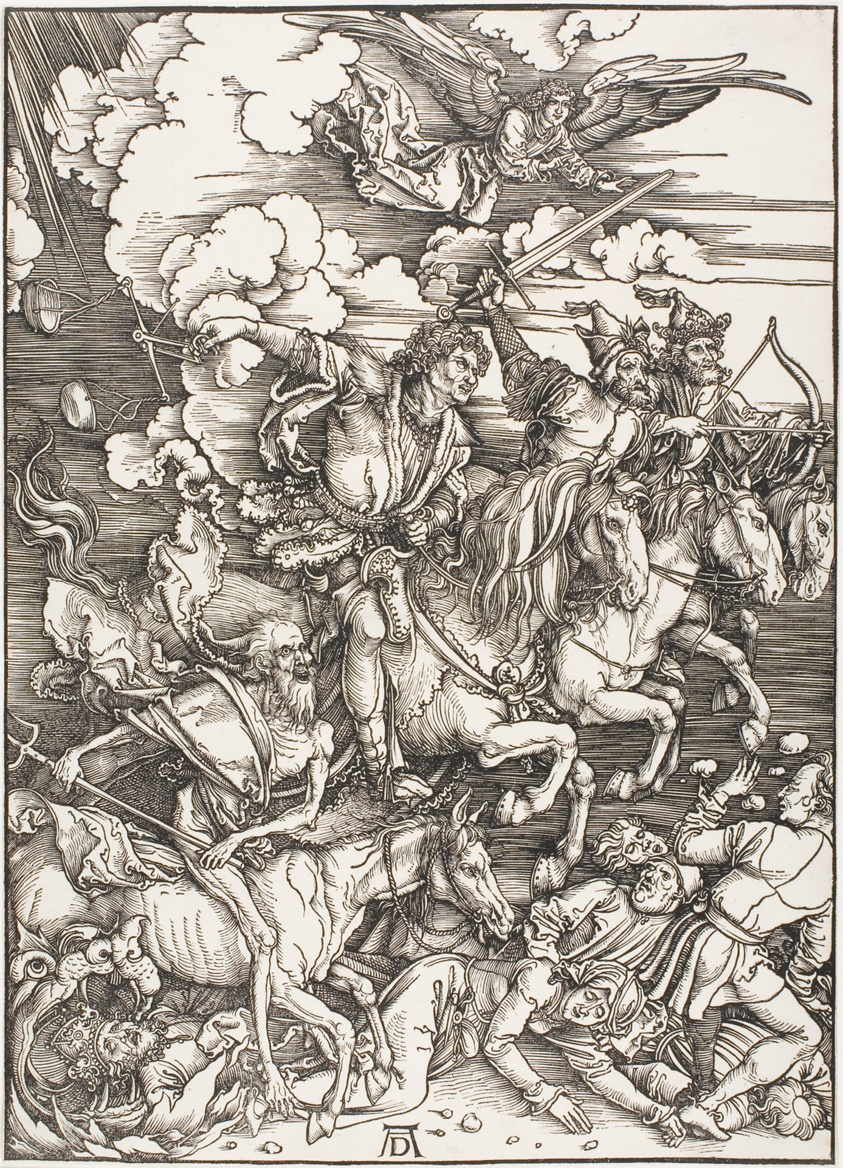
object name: Print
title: The Four Horsemen of the Apocalypse, from The Apocalypse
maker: Albrecht Dürer (German, 1471-1528)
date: c. 1496–98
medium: Woodcut in black on ivory laid paper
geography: Germany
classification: woodcut; print; prints and drawing; paper